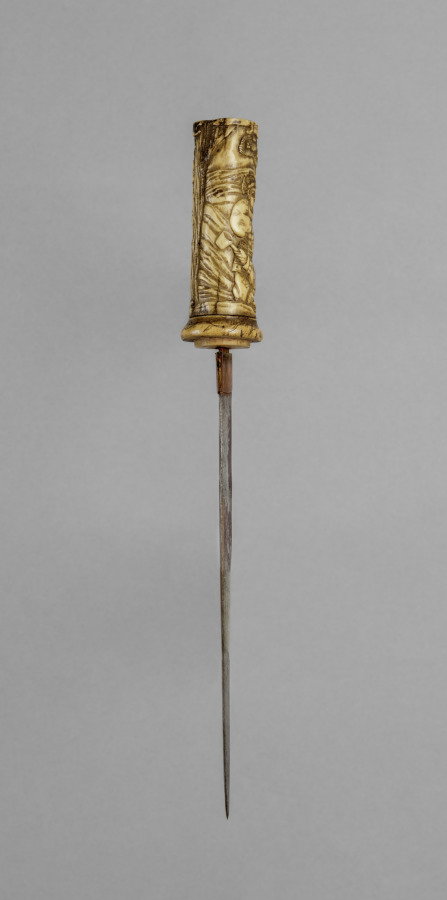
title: Knife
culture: Japan, Edo period (1615–1868)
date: late 1700s- early 1800s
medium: ivory, steel or iron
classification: Arms and Armor